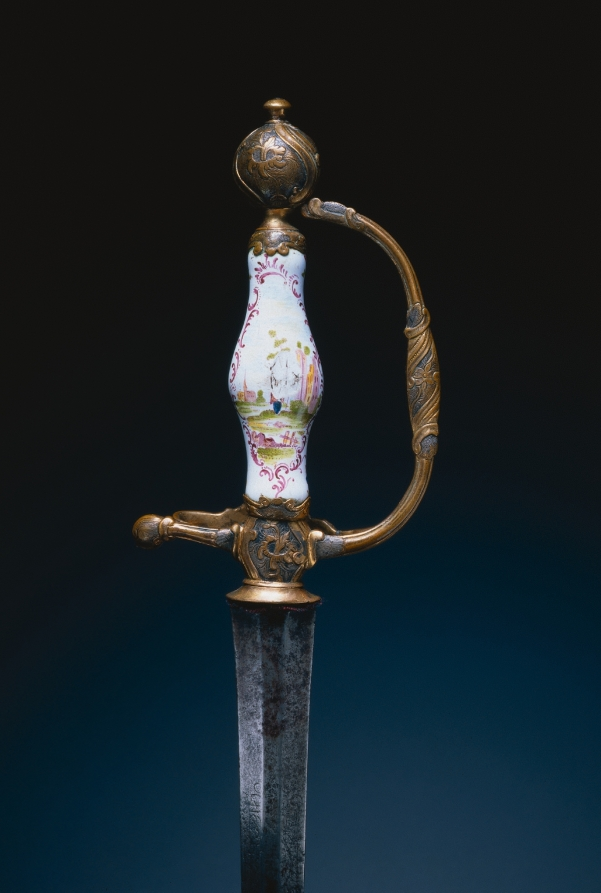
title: Small Sword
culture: Germany, 18th century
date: c. 1770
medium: steel, gilt-brass, porcelain grip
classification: Arms and Armor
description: The small-sword was a light, quick weapon that emerged during the 18th century. It was carried by unarmored civilians, the noblemen of the upper classes. The porcelain hilt, elaborately decorated, would have been visible even when the sword was sheathed–making this object more an accessory of male attire than a utilitarian weapon.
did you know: Small-swords with porcelain grips became fashionable in the mid- to late 1700s and added a colorful splash to male attire.